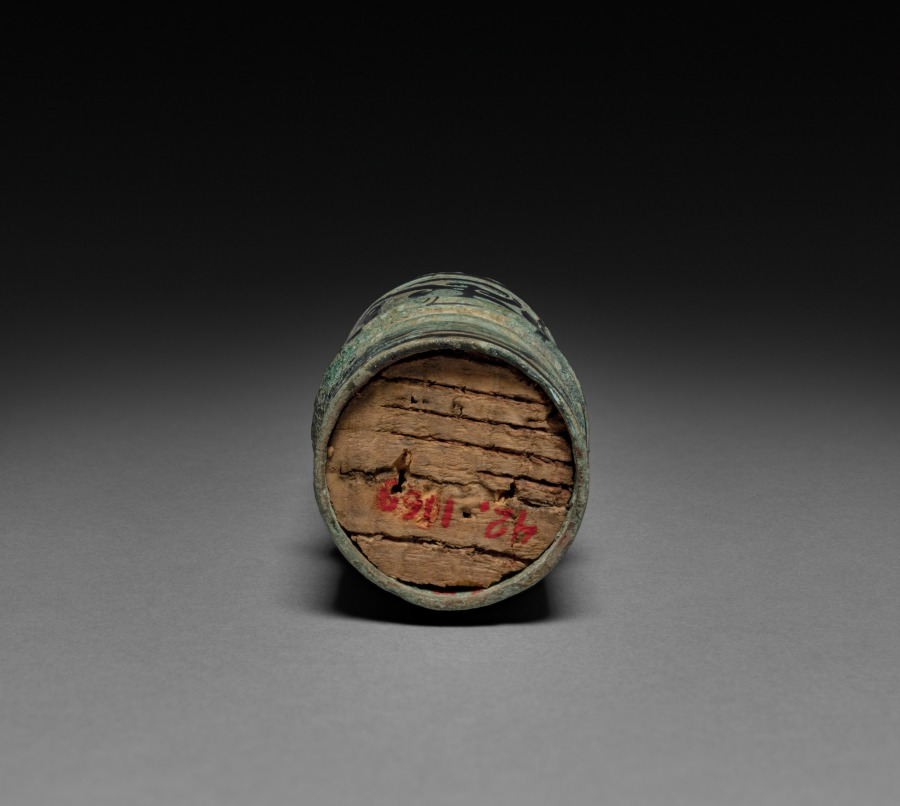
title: Shaft Mounting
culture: China, Eastern Zhou dynasty (770–256 BCE), Warring States period (475–221 BCE)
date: 500–300 BCE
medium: bronze inlaid with gold and silver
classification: Metalwork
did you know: This small circular finial is treated with whorls, angles, and horn- or beak-like parts that suggest either oxen or birds.